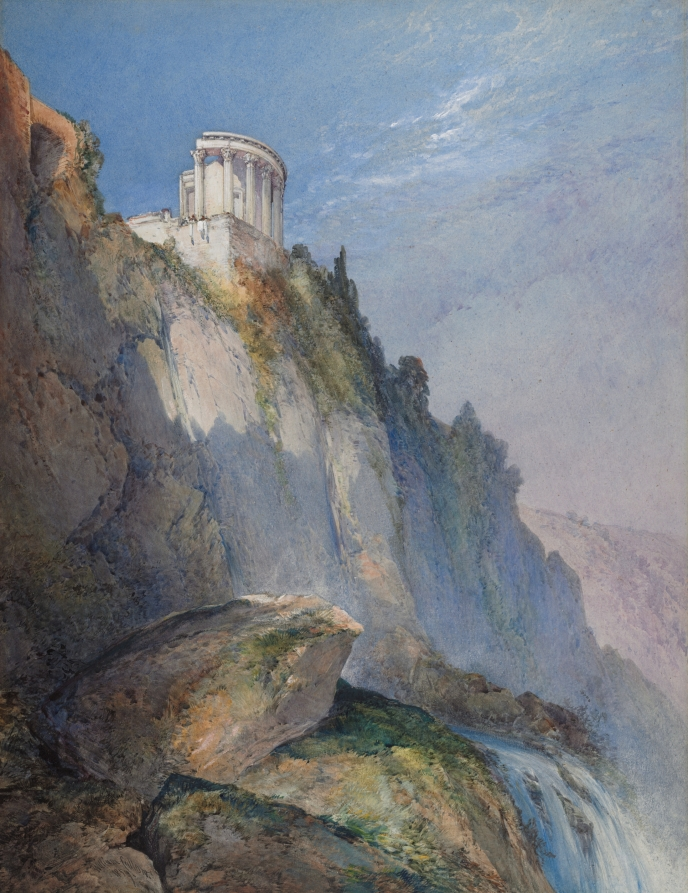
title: The Temple of Vesta and the Falls at Tivoli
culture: England, 19th century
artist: William Callow (British, 1812–1908)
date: 1859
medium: watercolor with gouache and graphite underdrawing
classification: Drawing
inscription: Signed and dated, at lower left, in dark brown wash: William Callow / 1859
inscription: inscribed on backing board (in a modern hand): No. 3 / Temple of Vesta / Tivoli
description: A meticulously finished, grand-scale presentation watercolor, this drawing was exhibited in 1859 at the Society of Painters in Water Colours in London. The view was taken from a low vantage point, foregrounding closely observed, moss-covered rocks amid the frothy cascade. Jewel-like, the Temple of Vesta surmounts the imposing cliff, gleaming white against a crisp, blue sky. The majesty of the view is underscored by the presence of nearly imperceptible figures in the far distance hanging linens to dry along the temple wall.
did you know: William Callow likely based the view seen in this drawing on sketches made during his first trip to Italy in 1840.